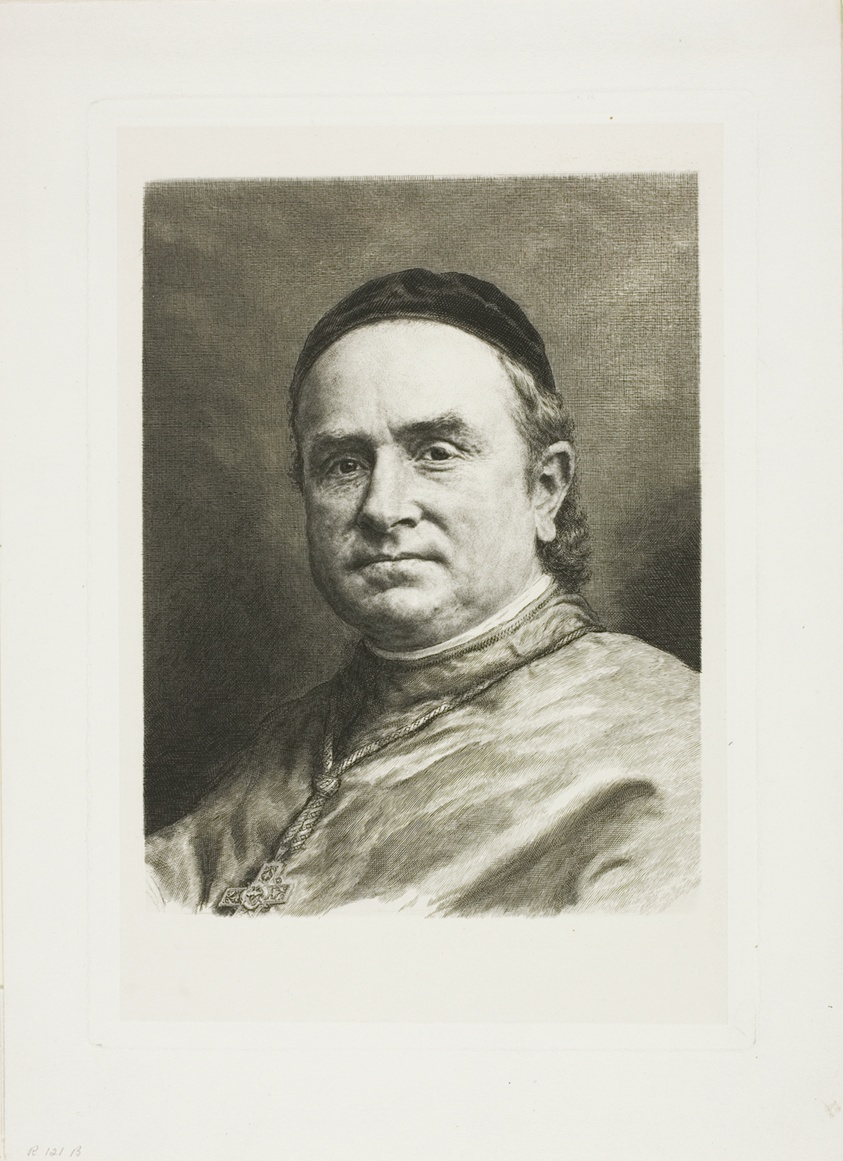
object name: Print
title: Monsignor Pie, Bishop of Poitiers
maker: Claude Ferdinand Gaillard (French, 1834-1887)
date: 1879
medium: Engraving on ivory China paper, laid down on white wove paper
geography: France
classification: engraving; print; prints and drawing